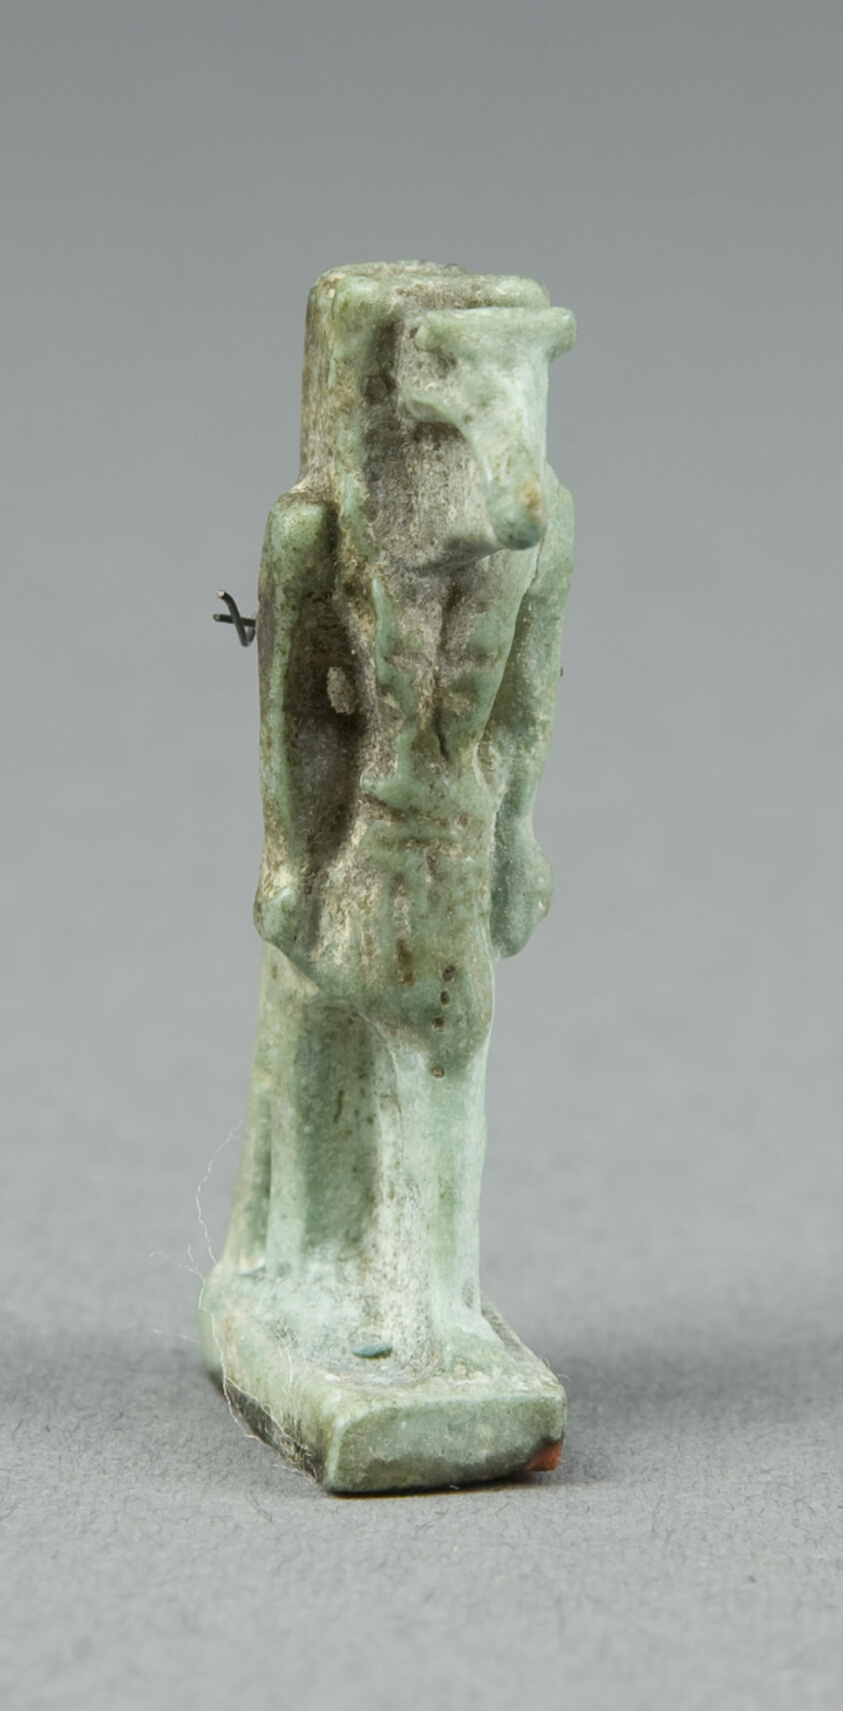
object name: Costume and Accessories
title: Amulet of the God Thoth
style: egyptian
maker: Egyptian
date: Late Period, Dynasties 26–31 (664–332 BCE)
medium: Faience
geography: Egypt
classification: amulet; jewelry; ceramics; ancient art; costume; faïence (composite material)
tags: gods (deities)